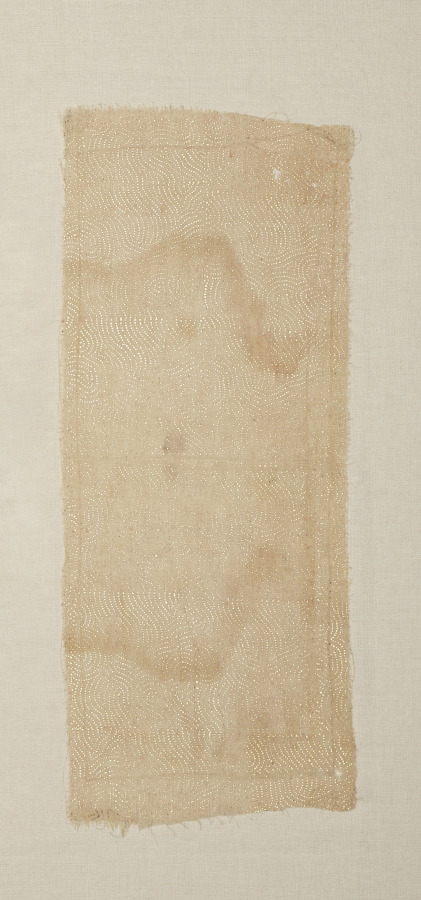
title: Fragment of Draped Apparel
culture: India, Rajasthan or Northern Deccan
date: 1700s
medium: Block printed with gold leaf (varak) on undyed plain weave cotton muslin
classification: Textile